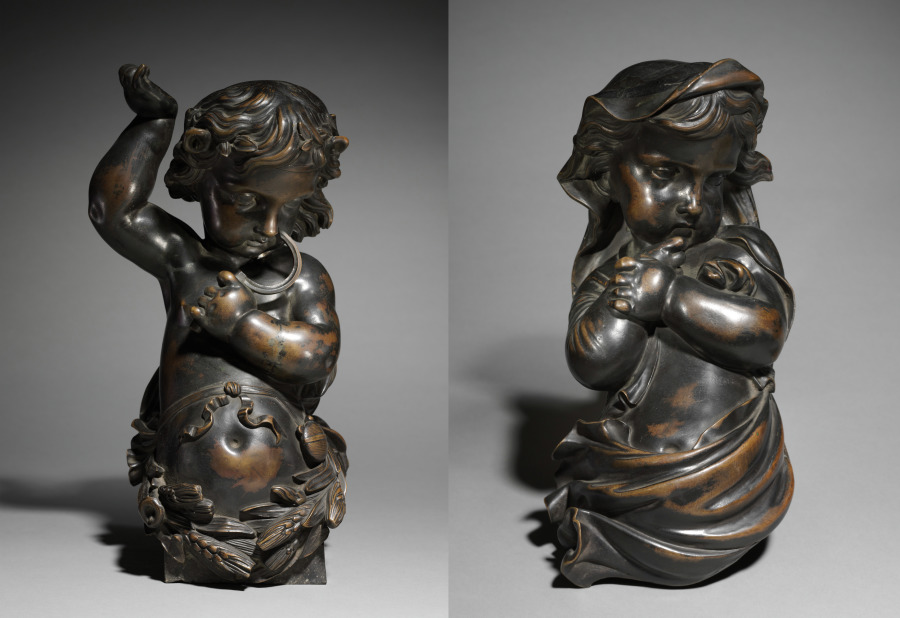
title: Pair of Bronze Statues: Autumn and Winter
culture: France, 19th century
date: 1800s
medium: bronze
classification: Sculpture